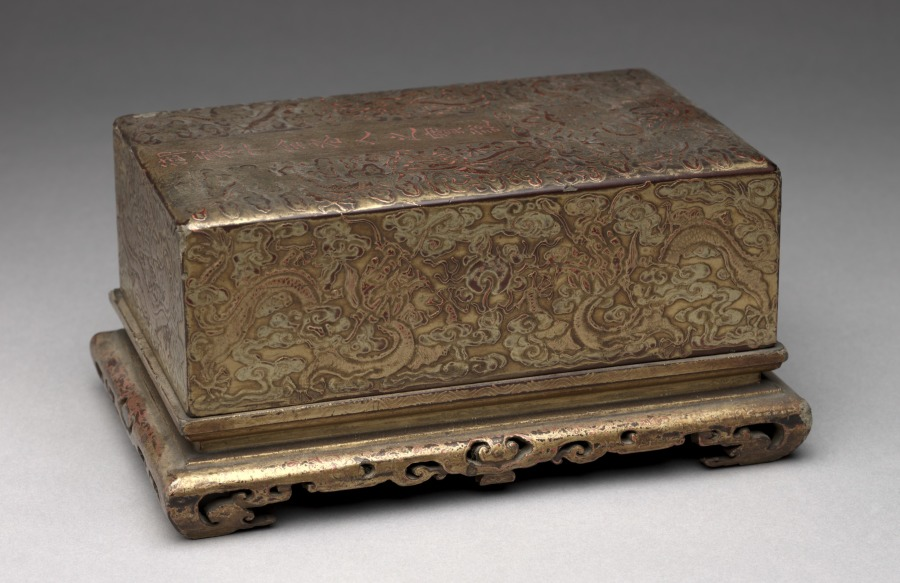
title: Box with Six Jade Tablets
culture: China, Qing dynasty (1644–1911), Qianlong reign (1736–95)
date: 1778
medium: Tablets: jade; box: pressed sizing on wood painted with lacquer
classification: Jade